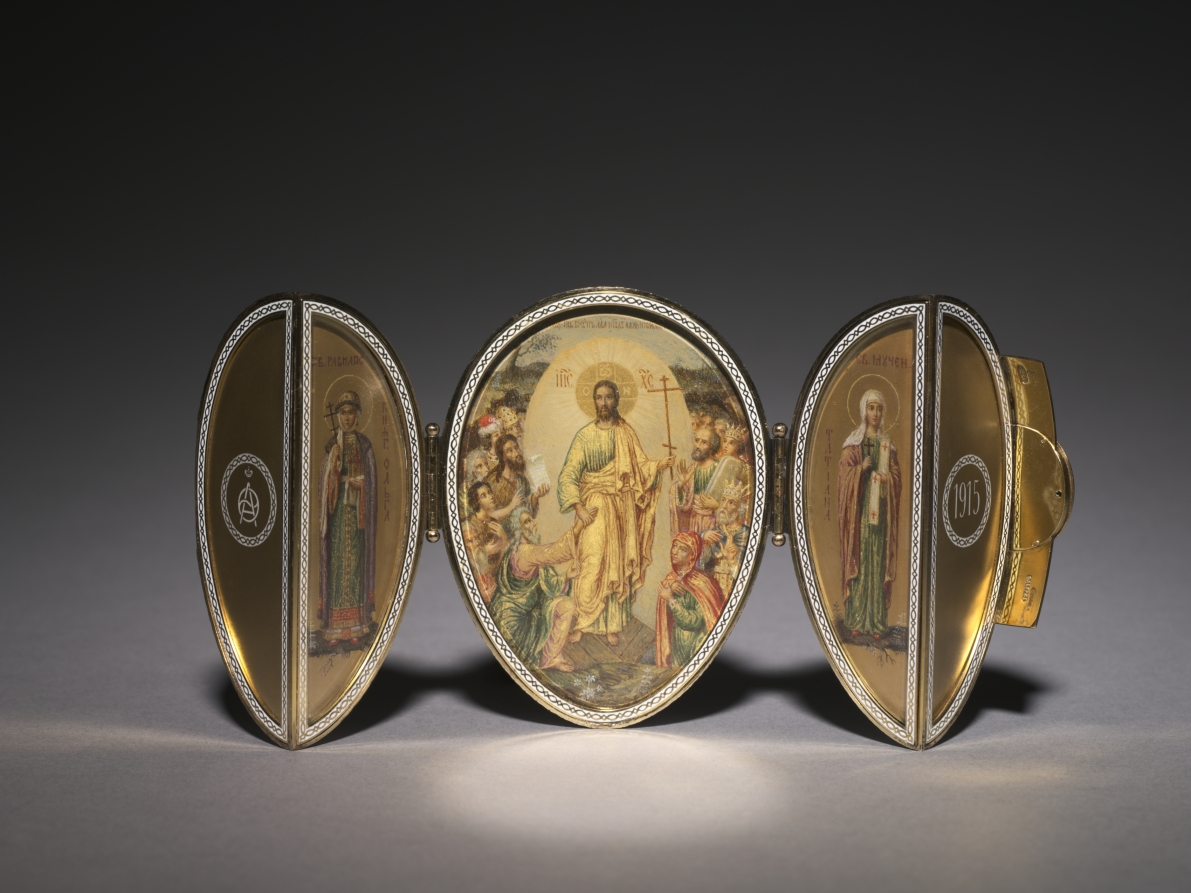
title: Imperial Red Cross Easter Egg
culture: Russia, St. Petersburg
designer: Peter Carl Fabergé (Russian, 1846–1920)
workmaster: Henrik Wigström (Russian, 1862–1923)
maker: House of Fabergé (Russian, 1842–1918)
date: 1915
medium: gold, silver gilt, enamel, glass, ivory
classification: Miscellaneous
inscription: inscribed on interior of egg: symbols for Alpha and Omega and imperial crown for Alexandra Feodorovna; 1915; inscriptions in Cyrillic, Old Church Slavonic, and Roman letters which identify Sts. Olga and Tatiana and presumably describe the central scene of the triptych.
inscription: Inscribed on silk velvet and satin lined case: double-headed eagle, Fabergé, Petersburg, Moscow, London (all in Cyrillic on lining of case); 17.559, abbreviation for "Red Cross" (in Cyrillic in red ink on outside of case).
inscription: Hallmarks: 72, Kokoshnik, lower case alpha in script [assay mark of St. Petersburg, 1908-26]; H.W. [initials of workmaster Henrik Wigström]; Fabergé (in Cyrillic).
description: The House of Fabergé made two imperial Easter eggs in 1915 that honored the contributions of Tsarina Alexandra and her two eldest daughters, Olga and Tatiana, to the war effort as Red Cross Sisters of Mercy. Compared to other Fabergé eggs elaborately ornamented with jewels, the eggs reflected the mood of austerity in Russia during World War I. This version becomes an icon when opened, revealing miniatures of the patron saints of the tsarina’s daughters. After the Russian Revolution, this relic of the Tsarist past was sold by the Soviet government to raise needed cash for the treasury.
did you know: This egg was confiscated by the Bolsheviks during the Russian Revolution and sold by the government of Josef Stalin in the 1930s to raise money for the Soviet treasury.